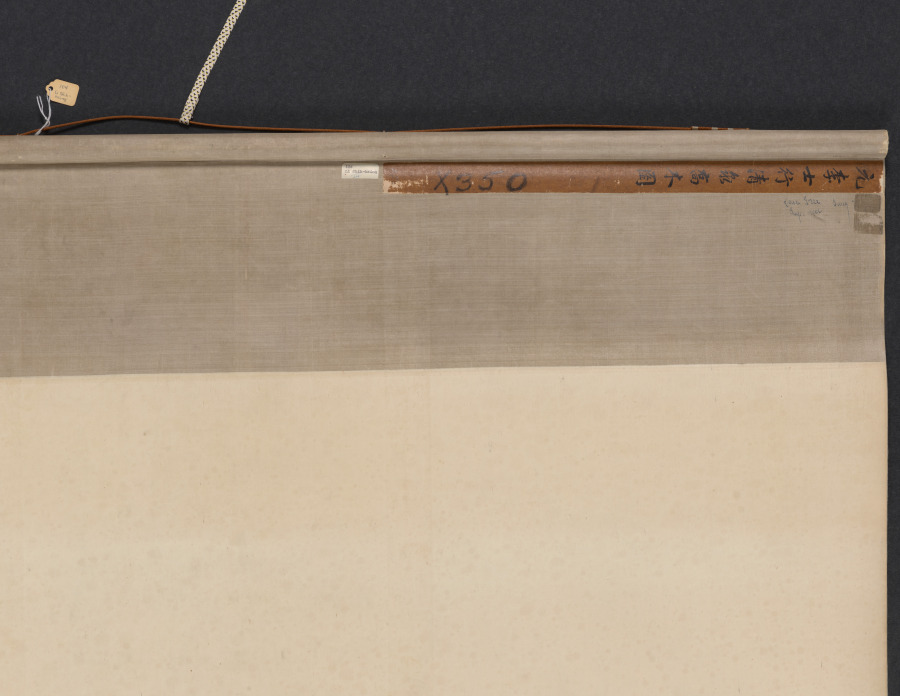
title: Old Trees by a Cool Spring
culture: China, Yuan dynasty (1271-1368)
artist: Li Shixing (Chinese, 1283–1328)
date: 1326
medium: hanging scroll; ink on silk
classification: Painting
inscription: 泰定丙寅年冬十二月薊丘李士行遵道作。[印] 李士行印; 李氏遵道; 遊戲翰墨.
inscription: 薊丘李侯能畫松，蟠根錯節騰蛟龍。 枯梢削鐵歲月古，細葉當風紫翠重。 昔人曾入子固夢，此株豈為秦官封。 畢宏韋偃偕已矣，請公放筆吾將從。 華溪九十翁沈夢麟書 蘊中上人題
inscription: [印] 明善堂所見書畫印記; [印] 怡親王寶